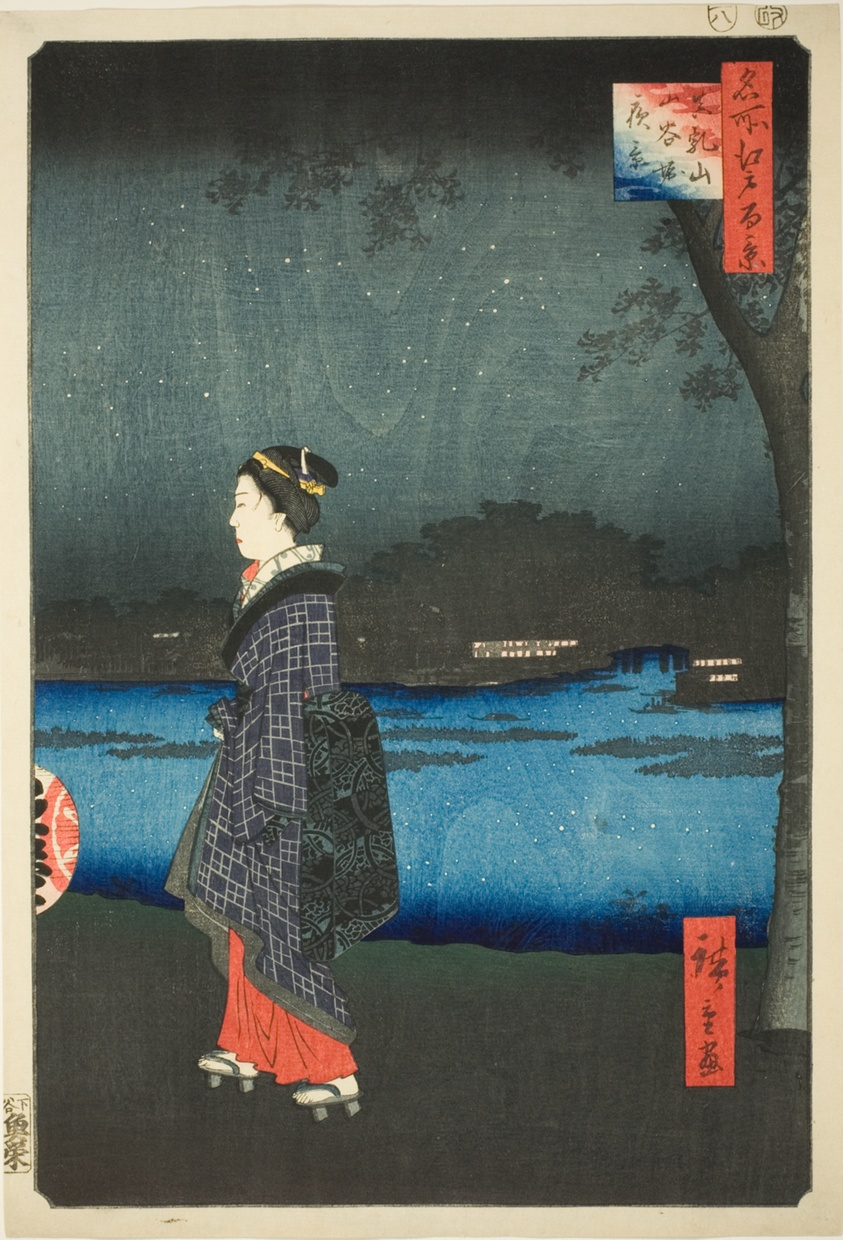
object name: Print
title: Night View of Matsuchi Hill and the San’ya Canal (Matsuchiyama San’yabori yakei), from the series "One Hundred Famous Views of Edo (Meisho Edo hyakkei)"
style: Japanese (culture or style)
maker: Utagawa Hiroshige 歌川 広重; Japanese, 1797-1858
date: 1857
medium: Color woodblock print; oban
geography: Japan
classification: woodblock print; print; asian art